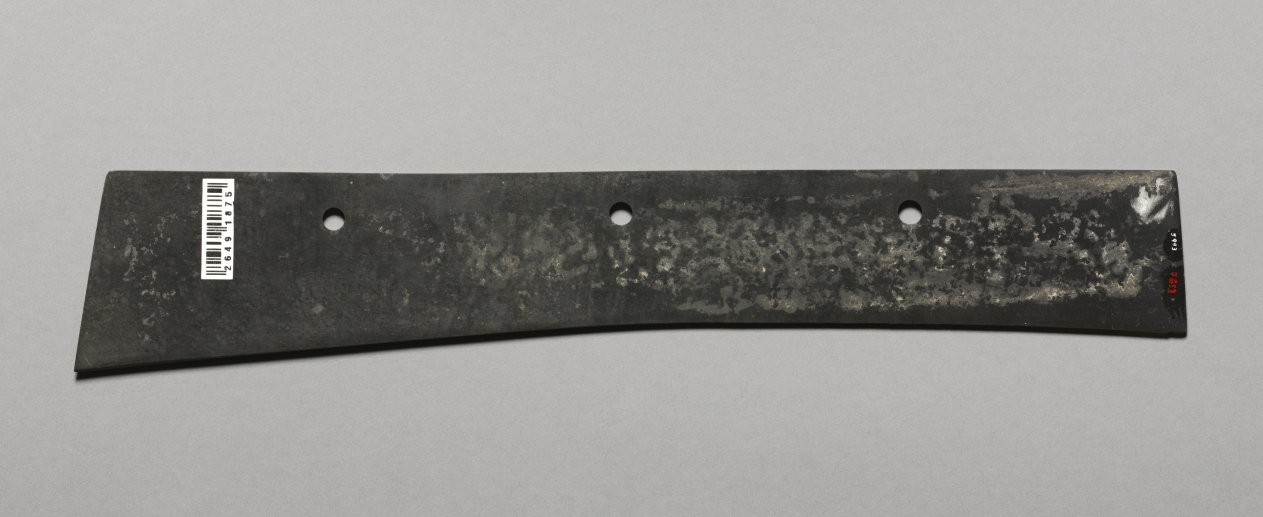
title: Ceremonial Blade with Three Perforations (Dao)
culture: Northwest China, Neolithic period to Bronze Age, Qijia culture (2000–1700 BCE)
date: 2000–1700 BCE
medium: jade (nephrite)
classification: Jade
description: This impressive blade combines the beauty of material, precision of geometry, and mastery of technique. The fine polish, silken sheen, and extreme thinness (only 2 mm thick) make it an outstanding example of meticulous workmanship in ancient jade craft. Recent recoveries of similar blades from a pit of a Qijia cultural site located in northwest China reveal that they were originally standing on their edges and were arranged in parallel formations at the ritual ground.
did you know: Although it may look made of metal, this blade is actually skillfully worked jade.